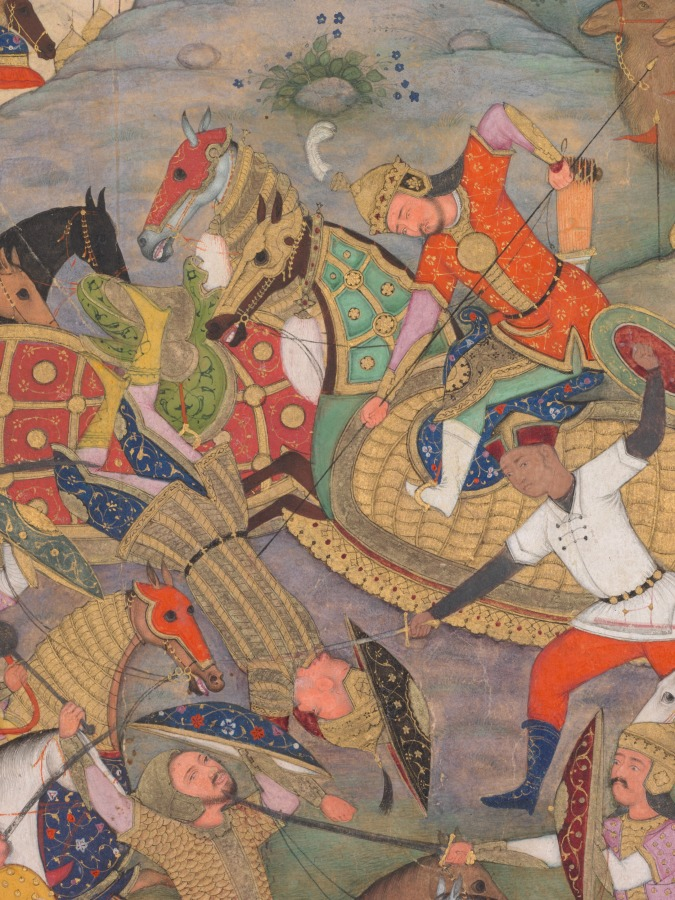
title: Battle between Manuchihr and Tur, from a Shah-nama (Book of Kings) of Firdausi (Persian, c. 934–1020)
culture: Mughal India, court of Jahangir (reigned 1605–27)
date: c. 1610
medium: Gum tempera, ink, and gold on paper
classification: Painting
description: This battle sets the stage for the ages-long enmity in the epic Shah-nama between the people of Iran and Turan—identified as Turkistan, the lands to the east of Iran. The conflict resulted from a bitter family feud that began when a warrior king divided his realm among his three sons; the older two were murderously jealous of the youngest, Iraj, to whom the best lands, those of Iran, were given. In this painting, the warrior in the center is Manuchihr, the grandson of Iraj, avenging his grandfather’s murder by slaying Tur, Iraj’s older brother to whom the less desirable lands of Turan were given. The confusion of battle is skillfully rendered through clustering warriors and warhorses together with varied postures, colors, and patterns.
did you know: Battles were waged to the sound of horns and the beat of drums on camels.